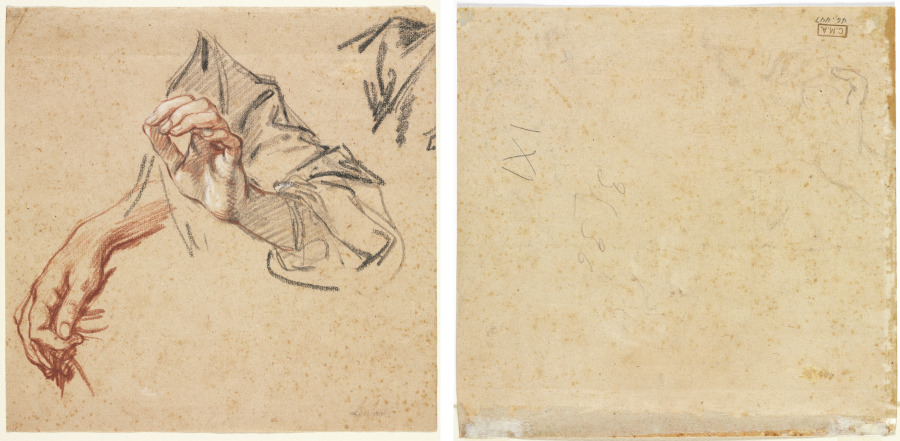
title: Study of Hands (recto); Sketch of a Hand (verso)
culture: France, 18th century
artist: Pierre Lenfant (French, 1704–1787)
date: 1700s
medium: red and black chalk heightened with white chalk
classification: Drawing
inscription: lower right, in graphite: lenfant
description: After Pierre Lenfant served as the official battlefield artist to King Louis XV in the War of the Austrian Succession (1740–1748), he and his family were awarded a lifetime residence at the royal Gobelins Manufactory on the outskirts of Paris. This delicate study in colored chalks may depict a weaver pulling threads in the textile factory.